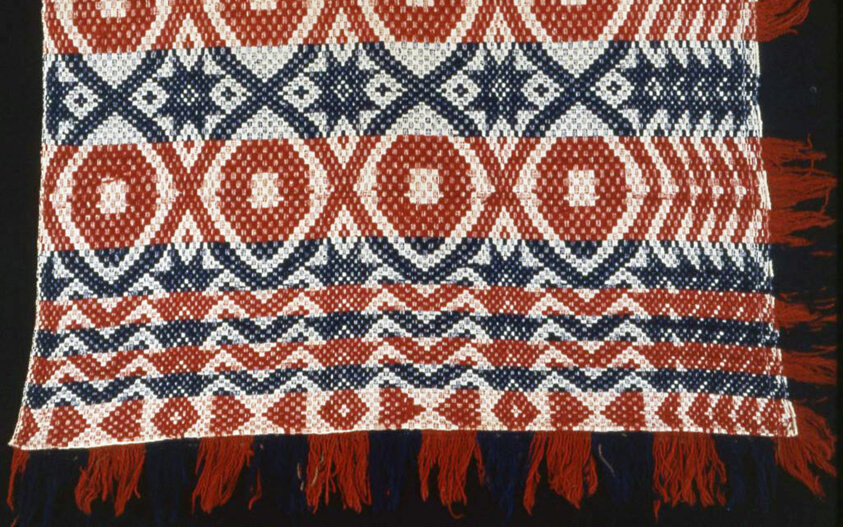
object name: Textile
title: Coverlet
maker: United States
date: 1820s/30s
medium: Cotton and wool, plain weave with supplementary patterning wefts (overshot) and extended supplementary patterning weft fringe; bottom edged with wool, plain weave with extended ground weft fringe; embroidered with wool in cross stitches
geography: United States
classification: textile; coverlet; weaving - coverlet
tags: coverlet